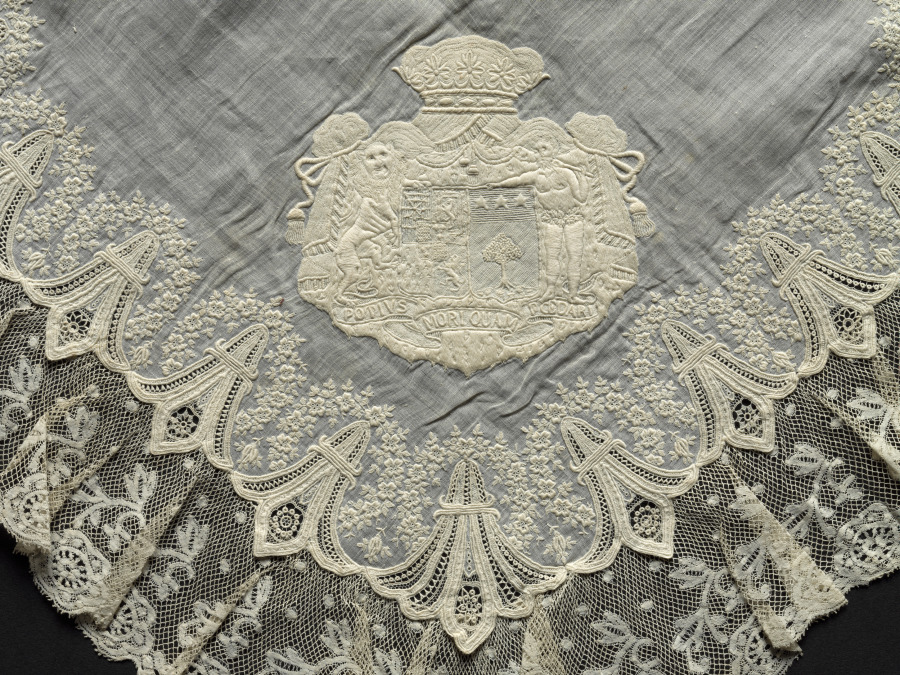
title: Lace Handkerchief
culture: Switzerland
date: 1850–99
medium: linen: embroidery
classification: Embroidery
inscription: large coat of arms with motto: "Potius monquam foedari."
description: In one corner, this handkerchief has a large coat of arms with the motto Potius monquam foedari (death before dishonor) embroidered on it.